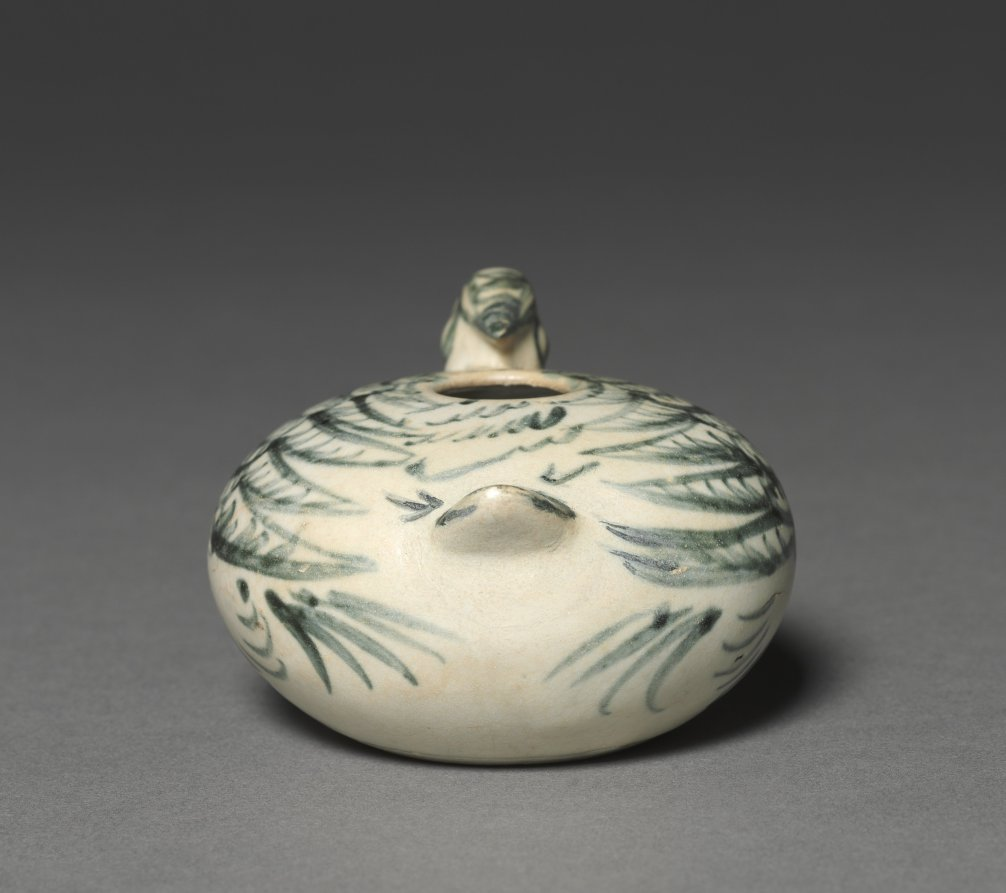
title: Bird-Shaped Jar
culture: Vietnam (Annam)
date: 1400s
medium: porcelain with underglaze blue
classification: Ceramic